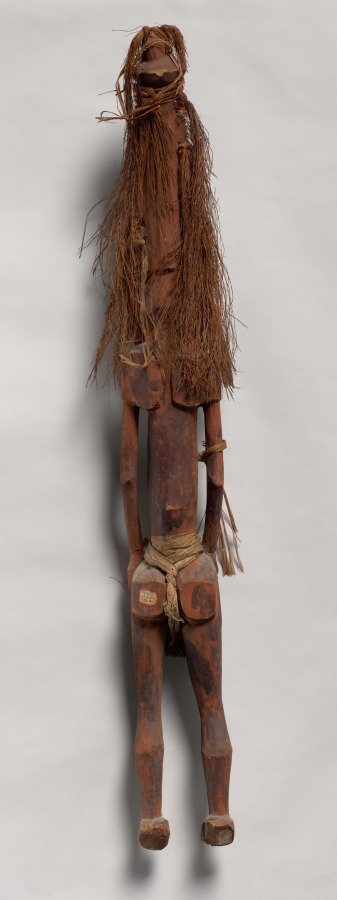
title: Ancestral Figure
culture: Melanesia, Papua New Guinea, Sepik River region, 19th century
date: 1800s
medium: painted wood with fiber and tapa cloth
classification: Sculpture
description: In the Sepik River region, village social and ceremonial life centers on the men's house. Ritual objects such as slit gongs, orators' stools, and flutes are stored there; the most sacred objects are kept hidden from women and children. Carved wooden figures, which probably represent ancestors, were preserved in the men's houses.